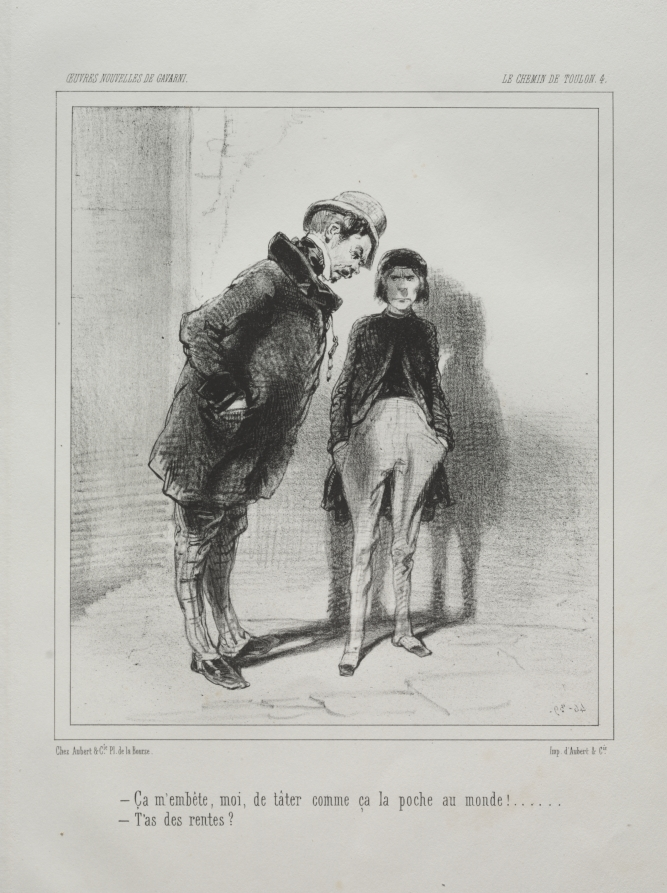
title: Chemin de Toulon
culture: France, 19th century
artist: Paul Gavarni (French, 1804–1866)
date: c. 1846–47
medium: lithograph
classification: Print